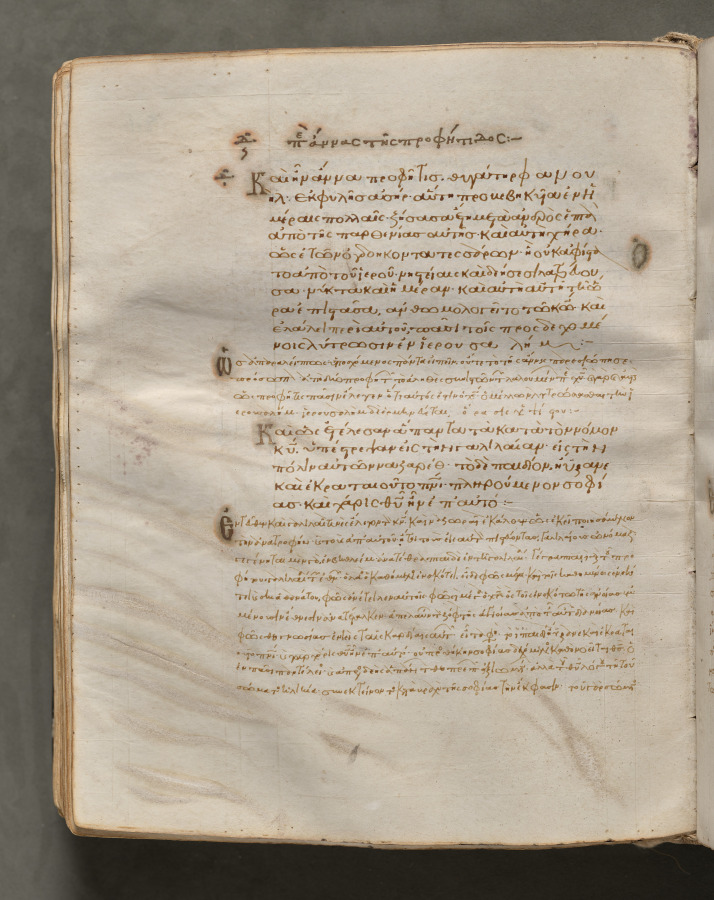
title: Text, folio 211 (verso), from a Gospel Book with Commentaries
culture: Byzantium, Constantinople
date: c. 1000–1100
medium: ink, tempera, and gold on vellum; leather binding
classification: Bound Volume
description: Each of the four gospels in this book opens on a page with brilliantly illuminated borders depicting the author of the text as well as birds-principally peacocks, symbols of the immortality of the soul-and fountains, representing the fountain of life and the salvation of the soul. This volume consists of 428 leaves with texts in Greek. Its level of sophistication suggests that it was probably written and decorated in a monastery in Constantinople.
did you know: Gospel Books were carried in procession through Byzantine churches.